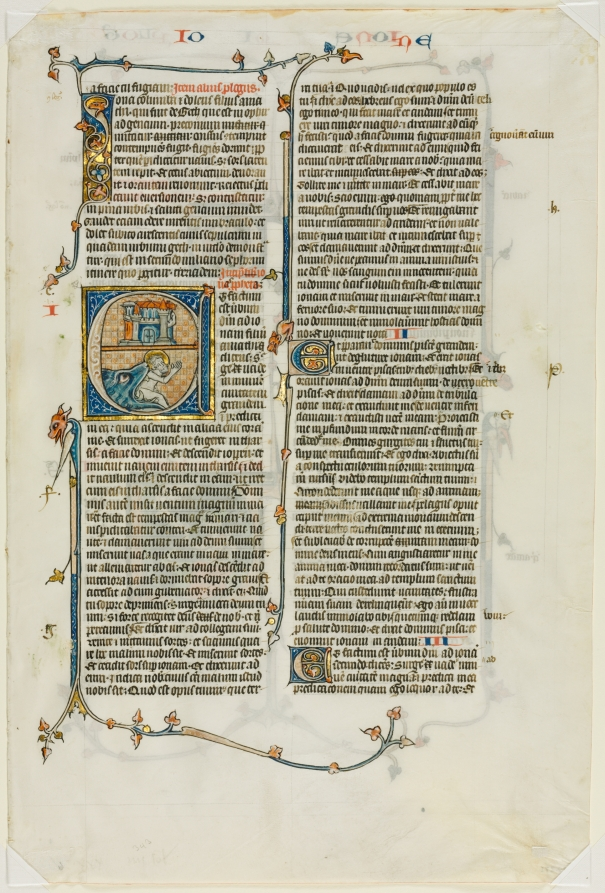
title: Single Leaf from a Bible: Initial E[t factum est] with Jonah Swallowed by the Whale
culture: France, Paris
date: c. 1290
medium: ink, tempera, and gold on vellum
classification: Manuscript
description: This leaf and the bifolium (double-leaf) displayed to the right both come from the same manuscript: a large lectern bible. The decorative scheme consists of a single historiated initial and spiky ivy-leaf tendrils along the margins, a Parisian convention just developing at this time. These "ascenders" and "descenders" originate from two of the initials and meander along the margins as separators and framing devices for the text. This ivy-leaf motif dominated book illumination in Paris through the early 15th century. The interior of the initial E contains a background of geometric patterns (called diapering) against which is set Jonah and the whale and the ancient city of Nineveh, the capital of the Assyrian Empire. The illusionistic effect creates three layers of perspective-the framing initial, the figures, and the background.